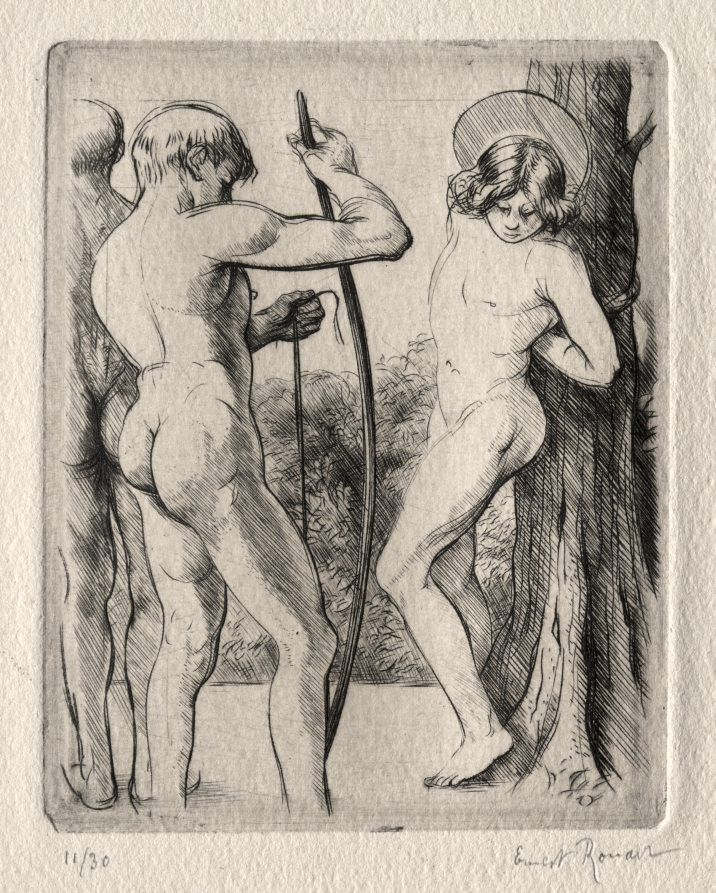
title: The Martyrdom of St. Sebastian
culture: France, 20th century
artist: Ernest Rouart (French, 1874–1942)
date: 1900s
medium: etching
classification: Print